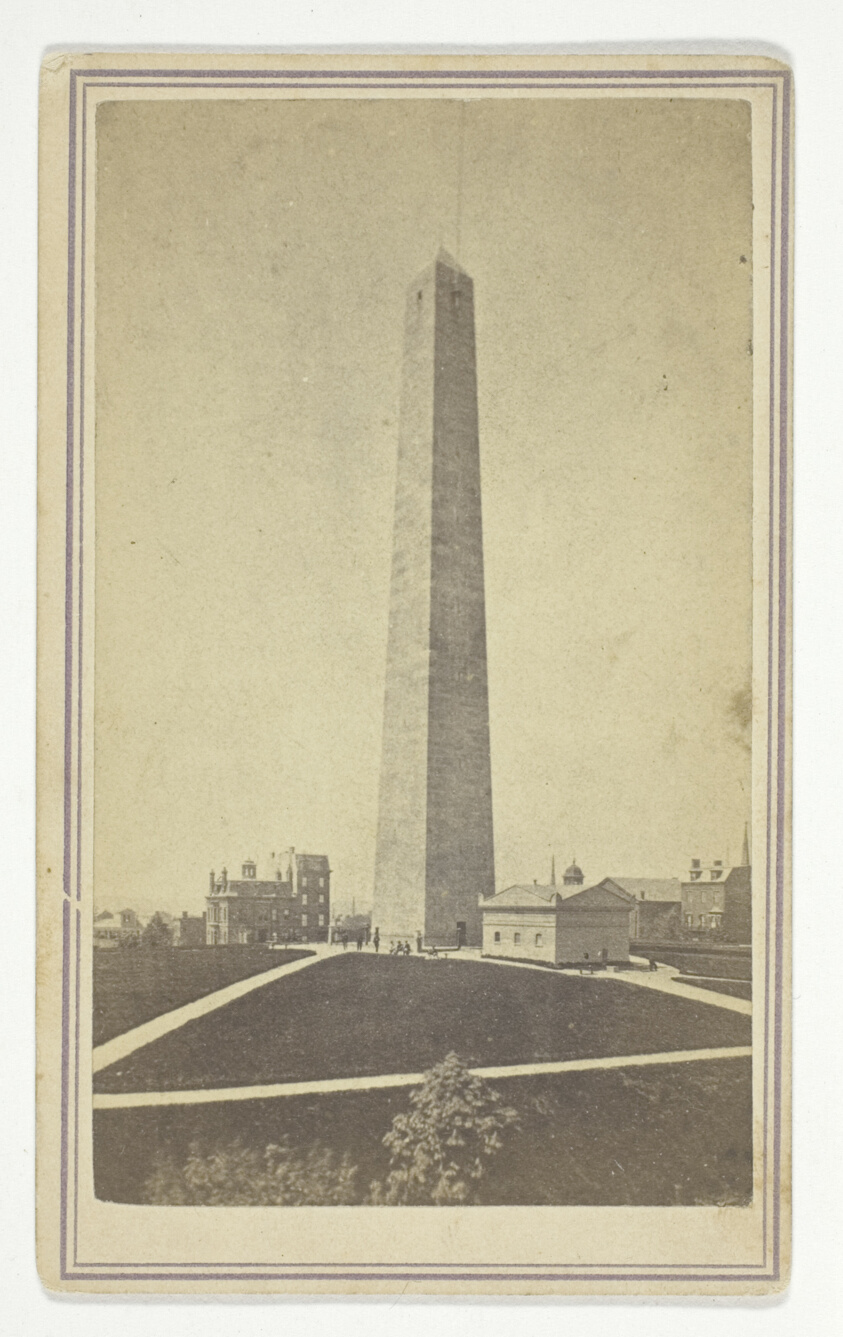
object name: Photograph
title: Bunker Hill Monument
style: 19th century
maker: J. J. Hawes; American, 1808–1901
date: 1845/1900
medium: Albumen print (carte-de-visite)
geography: United States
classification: carte-de-visite (albumen); photographic process; photography; card photographs; photograph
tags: Collected by Hugh Edwards